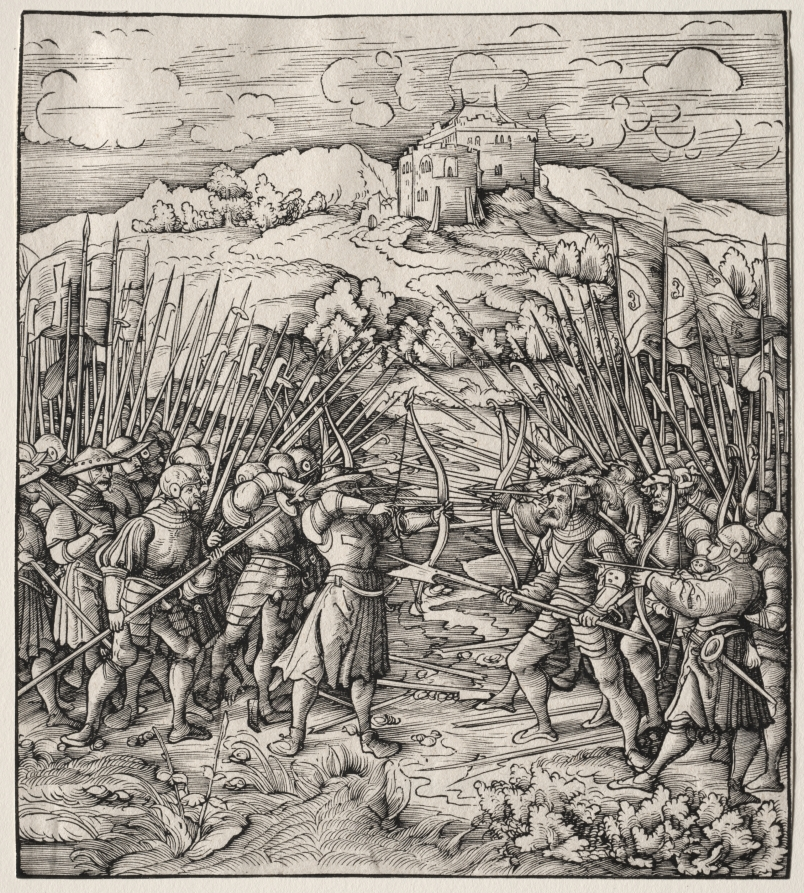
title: The Battle Against the Blue Company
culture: Germany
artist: Leonhard Beck (German, c. 1480–1542)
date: 1512–1518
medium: woodcut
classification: Print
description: This woodcut depicting a military campaign is an illustration for Der Weisskunig, or The White King, an autobiography of Holy Roman Emperor Maximilian I (reigned 1486–1519). Written in German, the book takes the form of a courtly romance novel featuring armored knights. The hero, Maximilian, is the White King. The Blue King and his party represent France. Maximilian was the earliest Renaissance prince to extensively use printed images and texts to cultivate his authority and spread his ideology. Der Weisskunig is one of several major print projects sponsored by the emperor and executed by a legion of advisors, authors, designers, and craftsmen.